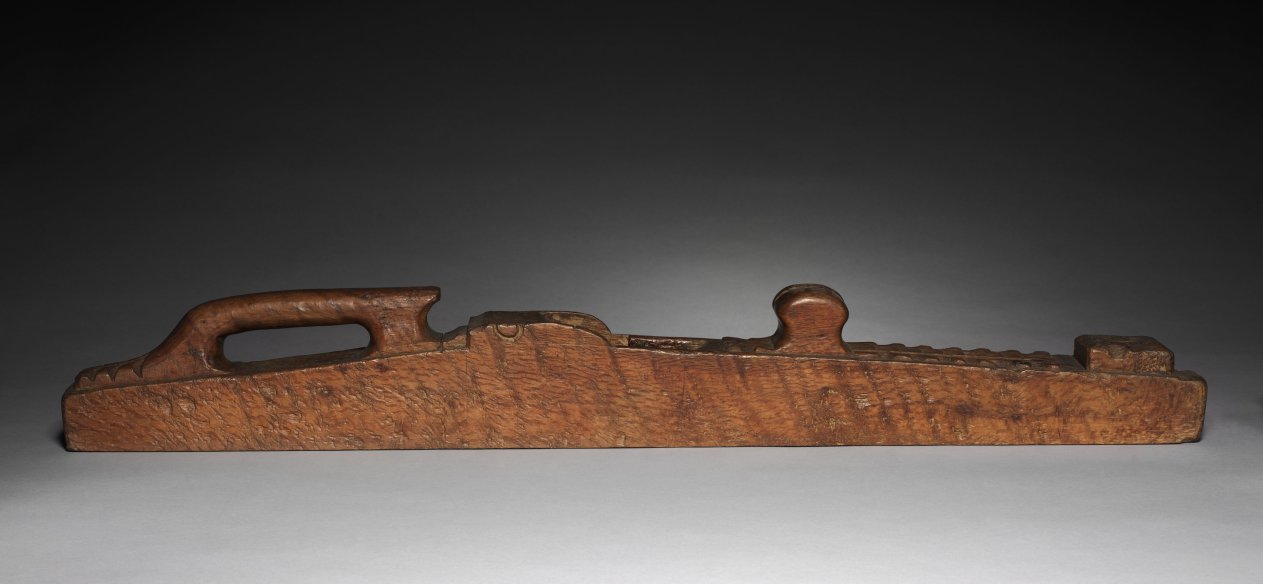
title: Plane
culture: France, 17th century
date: 1600s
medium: wood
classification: Tool